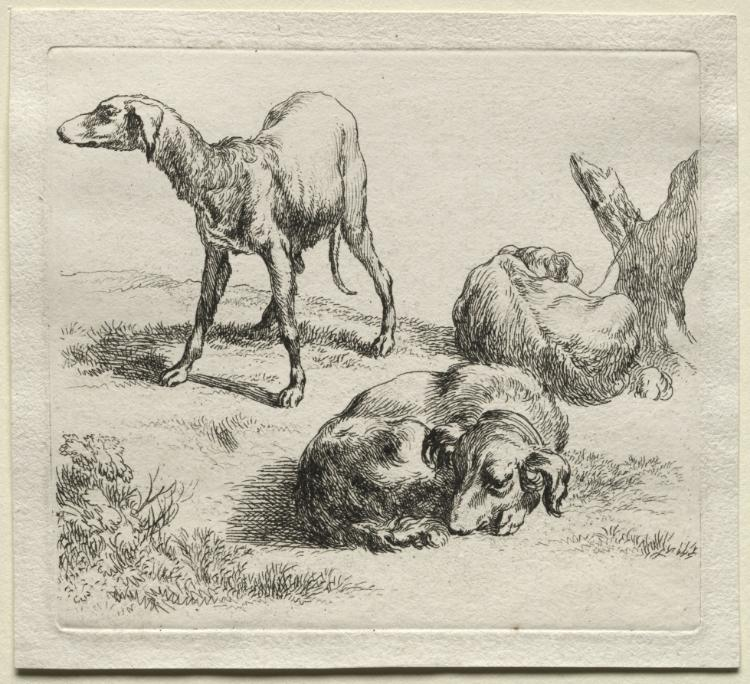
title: Animalia: Three Hunting Dogs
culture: Netherlands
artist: Nicolaes Berchem (Dutch, 1620–1683)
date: 1635–83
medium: etching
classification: Print